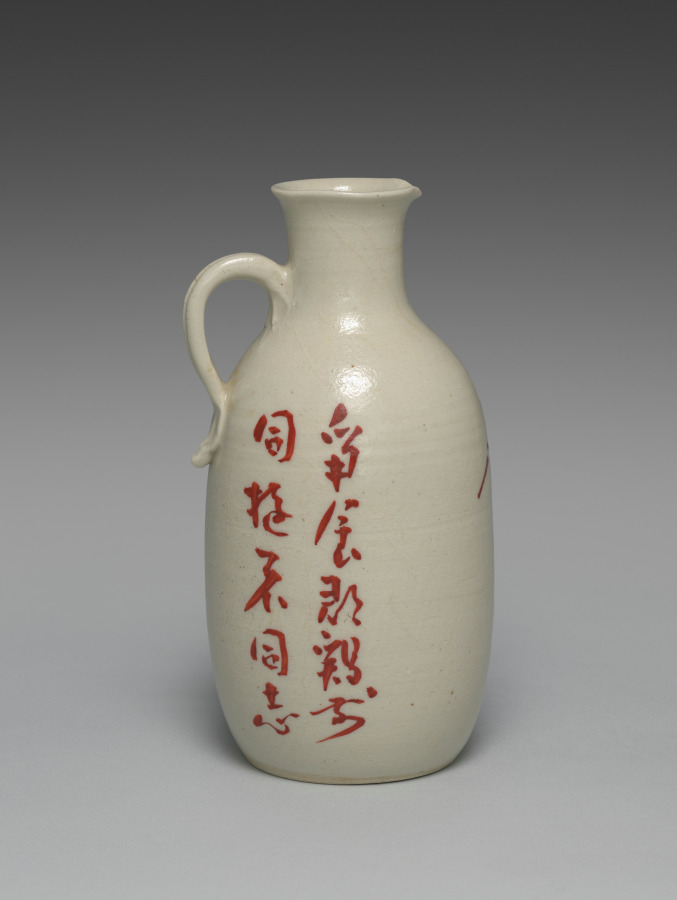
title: Crane Sake Pourer from Sake Pourers with Crane and Tortoises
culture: Japan, Meiji period (1868–1912)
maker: Seifū Yohei III (Japanese, 1851–1914)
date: 1893–1914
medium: One of a pair of sake flasks; porcelain with overglaze color enamel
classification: Ceramic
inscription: 爭食羣雞前，同遊者同志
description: This flask has a crane with a leg raised, while the other flask of this pair has stencil-like paintings of three turtles—a young one with its parents. Cranes and turtles are well-recognized symbols of longevity in East Asia, with the turtle said to live for ten thousand years and the crane for one thousand. Each flask also has a poem on the back, one in Chinese and the other in Japanese. The Chinese poem on this crane flask is two nonconsecutive five-character lines from a poem called “Crane Feelings” by the famous Tang dynasty poet Bai Juyi (772–846). One character in one of the lines has been altered. This creative poetic sampling results in a verse reading zheng shi qun ji qian, tong you zhe tong zhi 爭食羣雞前，同遊者同志. It could perhaps be translated, “before the flock of chickens competing for food, those traveling together have the same ambitions.”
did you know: This pair of seemingly humble sake pourers celebrate longevity and delight in a literary tradition that embraces multiple forms of poetic expression.